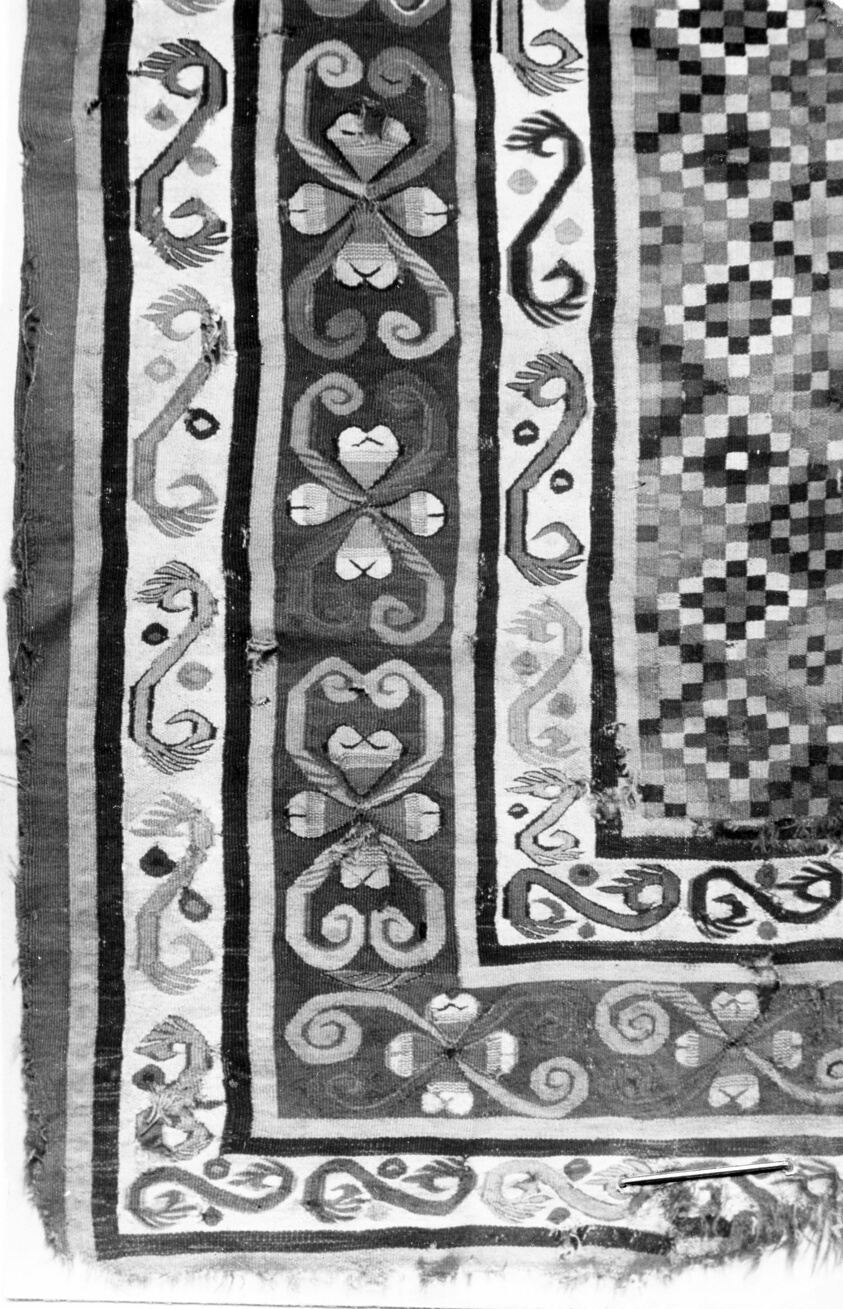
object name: Textile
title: Panel (Tapestry Weave)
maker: Peru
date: A.D. 1600/1800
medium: Wool (probably sheep and camelid); tapestry weave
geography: Peru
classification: textile; weaving